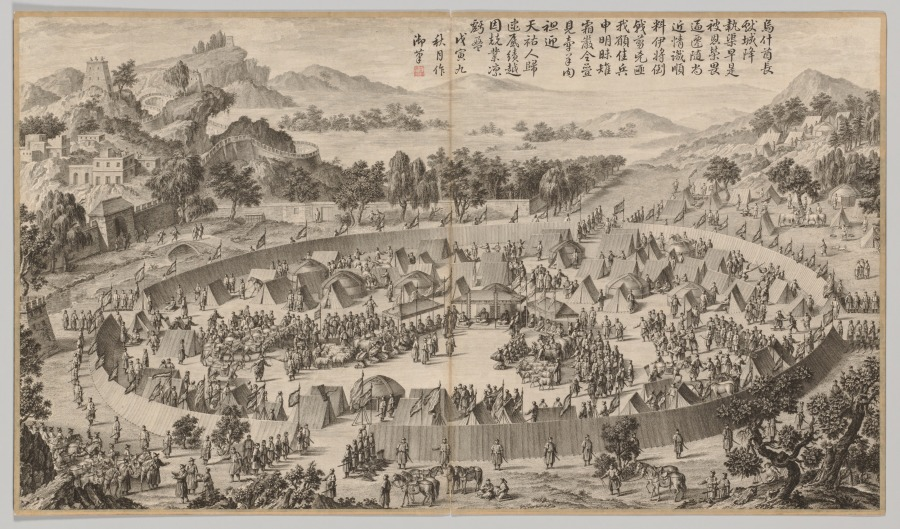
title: Chieftain Wushe Surrendering the City: from Battle Scenes of the Quelling of the Rebellions in the Western Regions, with imperial Poems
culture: China, Qing dynasty (1644–1911), Qianlong reign (1736–95)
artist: Jean Damascene Sallusti (Italian, d. 1781)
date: c. 1765–74; poem dated 1758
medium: etching, mounted in album form, 16 leaves plus two additional leaves of inscriptions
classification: Print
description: This set of etchings was commissioned by Emperor Qianlong to record in pictorial terms the courage of his generals and soldiers in quelling the rebellions in the Western Regions. Qianlong added his own poem to each of the etchings, indicating his appreciation and pride in this demonstration of military might. "Western Regions" refers to the present-day Xingjiang province, often described in Western writing as "Central Asia."